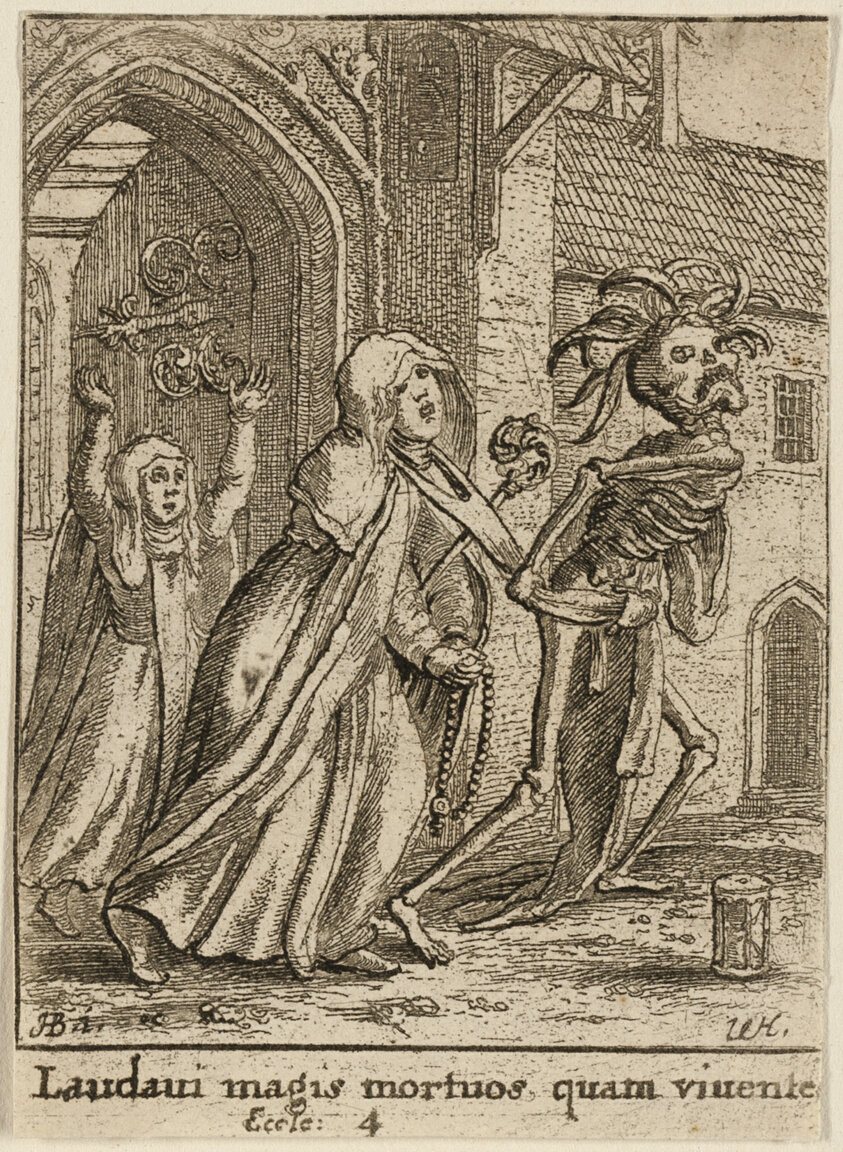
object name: Print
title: The Abbess and Death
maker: Wenceslaus Hollar (Bohemian, 1607-1677); after Hans Holbein the younger (German, c.1497-1543)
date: 1651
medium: Etching on ivory wove paper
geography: Bohemia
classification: etching; print; prints and drawing